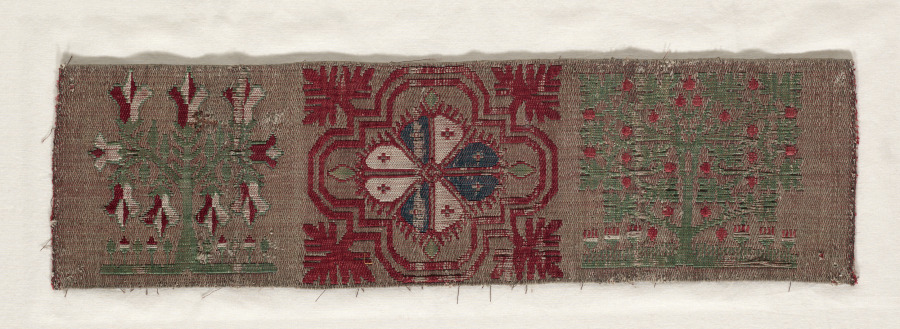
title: Fragments from a Chasuble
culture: Germany, Cologne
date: 1300s–1400s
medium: Linen, silk, metal-wrapped thread: compound twill weave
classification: Textile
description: The Cleveland Museum of Art has a number of band fragments that may have been created in a workshop in Cologne, Germany, on the Rhine River. They may have been produced in series and could be adapted for various contexts. Such bands are found, for example, in very similar form on the nearby chasuble, or sleeveless outer vestment. The inscriptions Jesus and Mary on the bands also point to such a use.